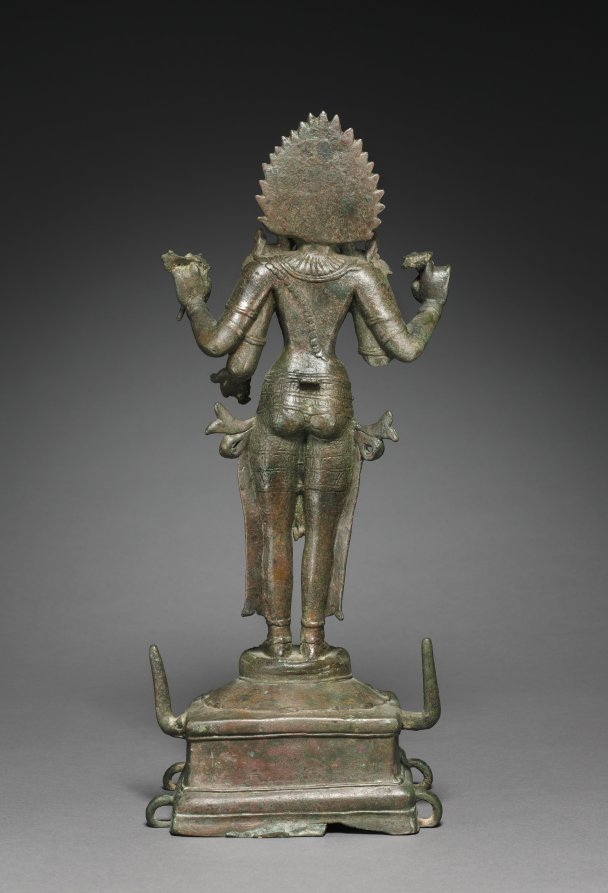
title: Kali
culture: South India, Tamil Nadu, Chola period (900-13th century)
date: 900s–1000s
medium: bronze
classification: Sculpture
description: The female aspect of Shiva, the goddess Parvati, has her own cycle of myths, and she herself emanates into different forms. Some branches of Hinduism consider the goddess to be the supreme creator divinity herself, who generated all the other gods, including Shiva. This bronze sculpture could have been affiliated with either branch. Kali is the wrathful form of the goddess generated in the midst of a battle with a demon that the gods failed to conquer. Kali was to drink his blood before any drop fell to ground, or else a new demon would instantly be generated. The demons are metaphors for human vices, such as egotistic pride and arrogance.